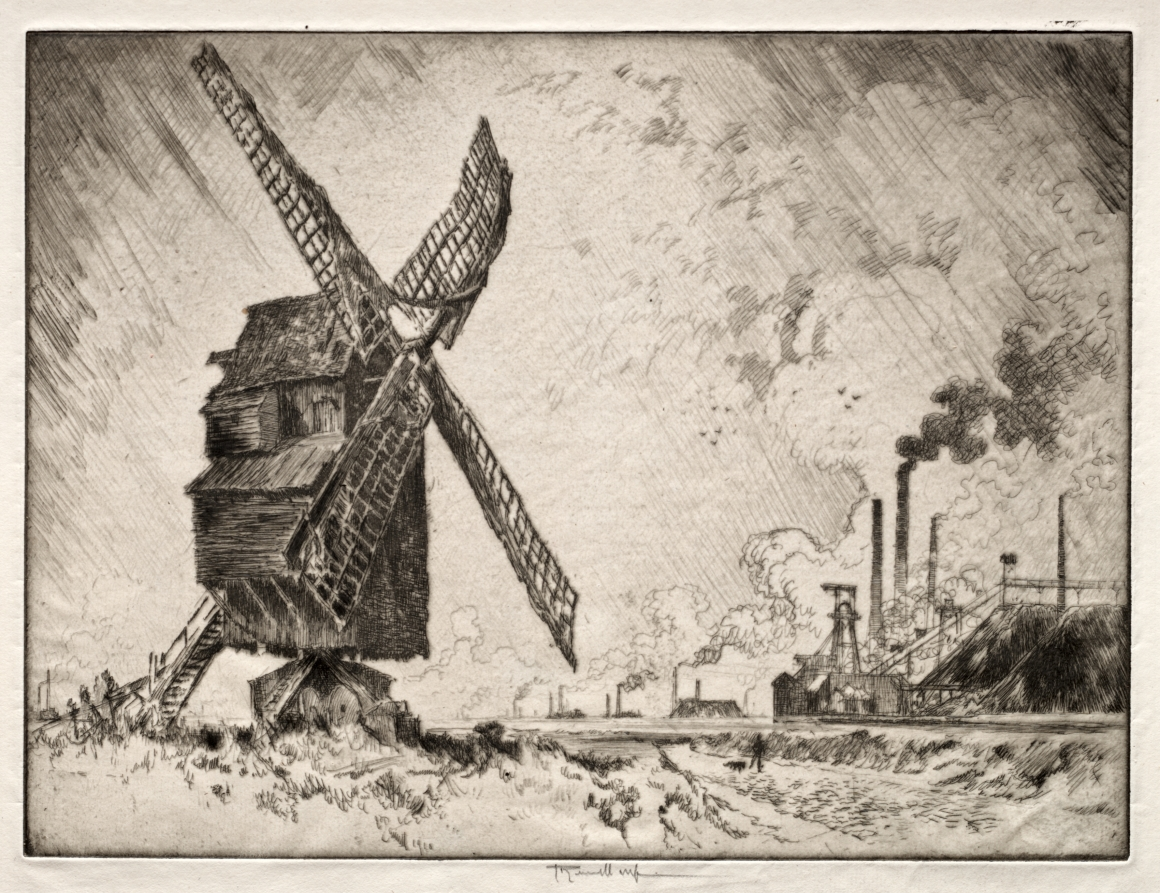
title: Old and New Mills, Valenciennes, France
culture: America, late 19th-early 20th Century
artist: Joseph Pennell (American, 1857–1926)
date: 1910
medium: etching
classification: Print